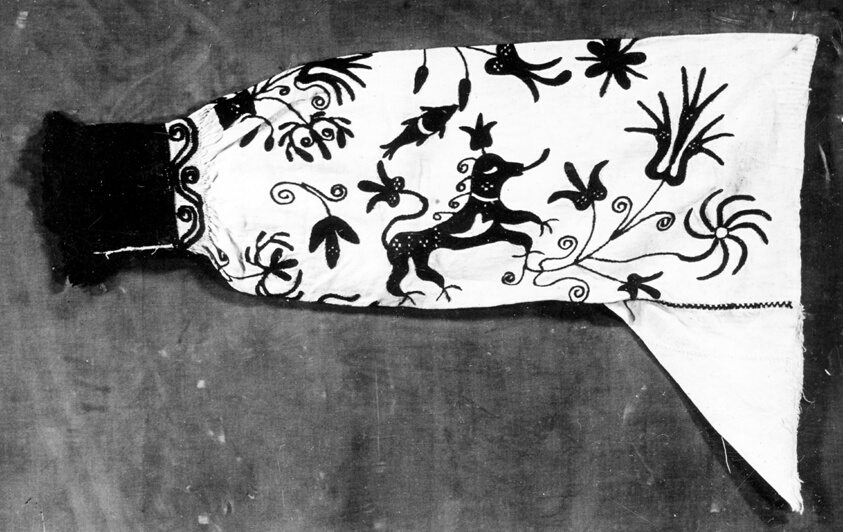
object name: Textile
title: Sleeve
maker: Spain, Salamanca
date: 19th century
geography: Spain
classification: textile; needlework (visual works); costume; embroidery; costume - needlework; dress (garment); clothing